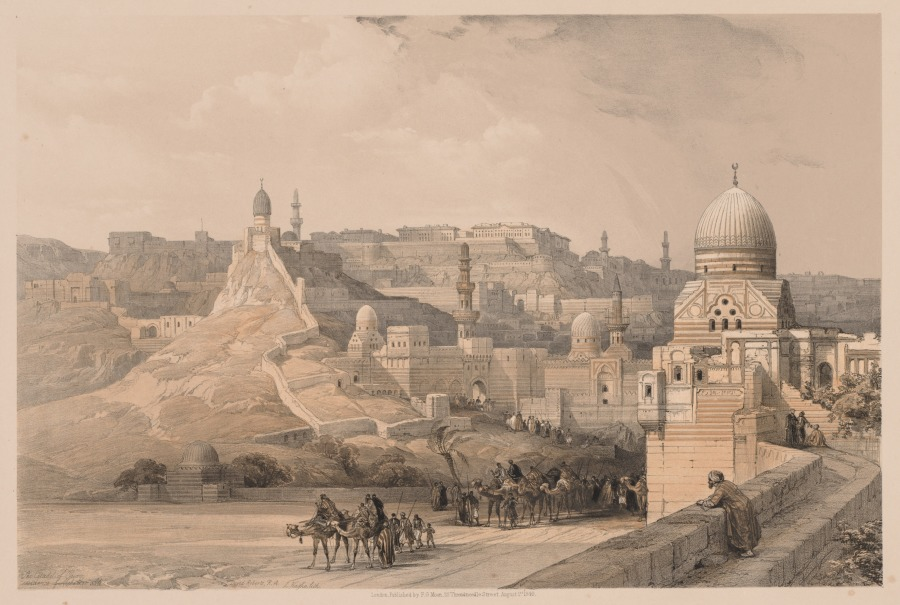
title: Egypt and Nubia: Volume III - No. 34, The Citadel of Cairo, Residence of Mehemet Ali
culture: England, 19th century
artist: Louis Haghe (British, 1806–1885)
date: 1838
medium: color lithograph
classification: Print